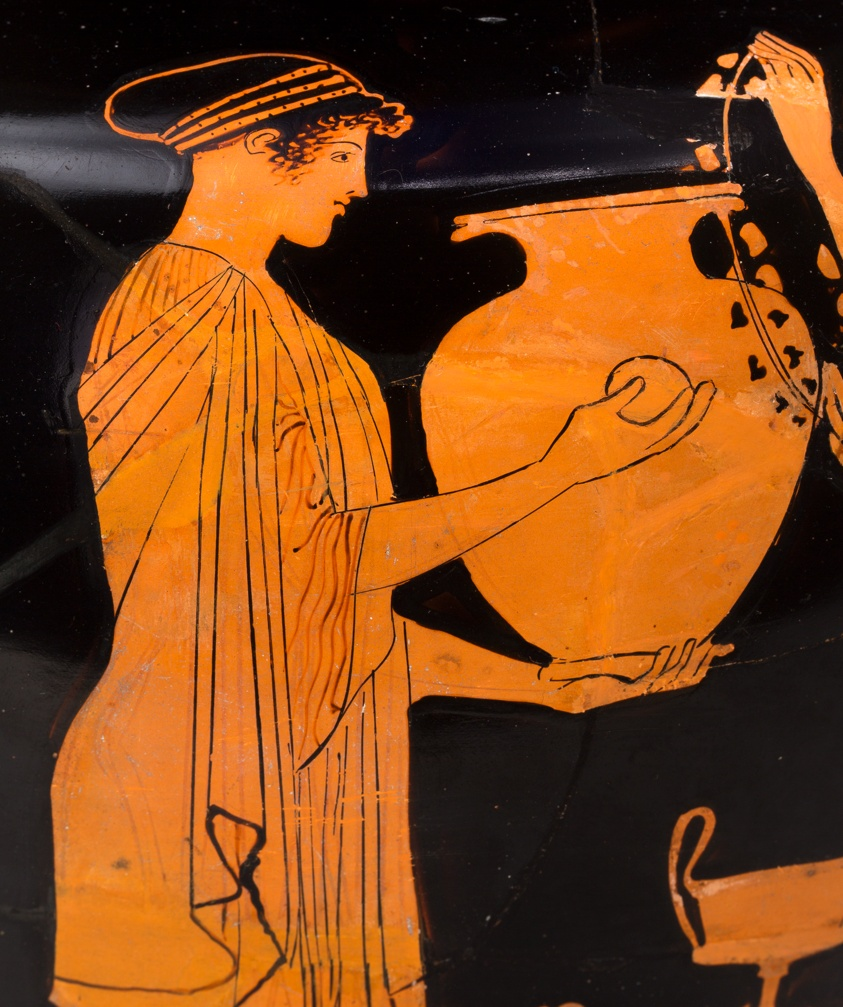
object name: Vessel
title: Stamnos (Mixing Jar)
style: high classical, Classical, attic, red-figure, ancient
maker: Attributed to the Chicago Painter; Greek; Athens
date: about 450 BCE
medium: terracotta, red-figure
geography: Athens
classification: vessel; earthenware; ceramics; ancient art; container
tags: drinking, dining, women, human figures, Greek, females, festivals, female figures, daily life, men, chairs, Greece, cups, interiors